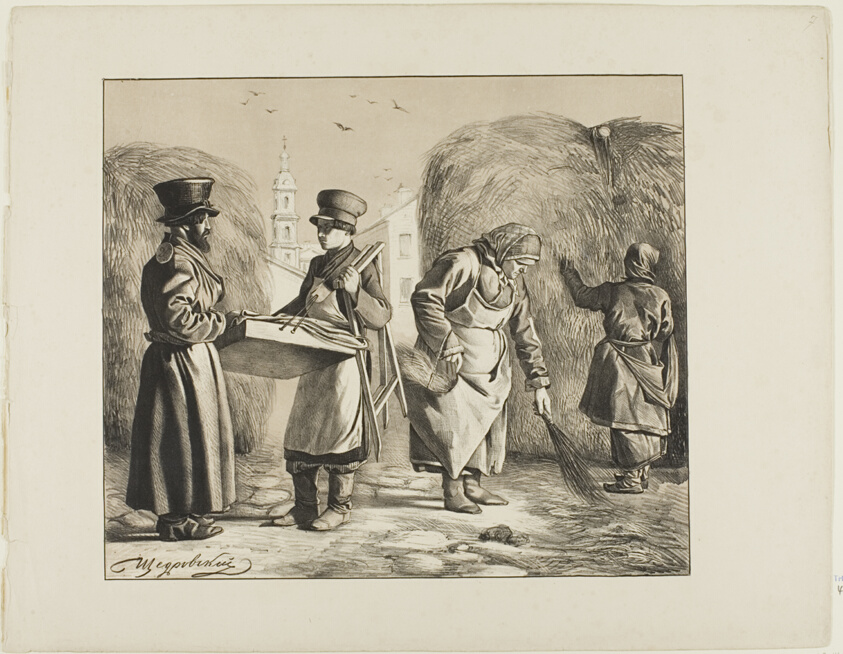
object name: Print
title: Scenes from Russian Folk Life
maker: Ignatii Stepanovich Shchedrovskii (Russian, 1815-1870)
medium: Color lithograph on paper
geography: Russia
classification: lithograph; print; prints and drawing